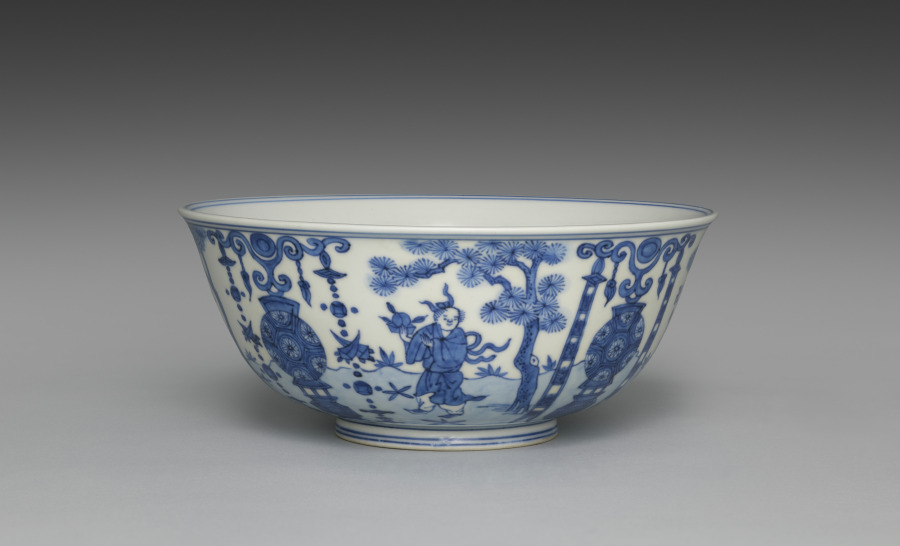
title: Bowl from Nesting Bowls with Daoist Immortals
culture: Japan, Meiji period (1868–1912)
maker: Seifū Yohei III (Japanese, 1851–1914)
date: 1893–1914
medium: Inner bowl from a set of three bowls; porcelain with underglaze blue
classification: Ceramic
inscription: 大日本清風造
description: Yohei III was capable of ink painting–like compositions in underglaze blue, as well as more decorative ones like that on this set of three nesting bowls. Bowls with very similar designs in five colors were produced in the reign of the Wanli emperor (reigned 1572–1620) during the Ming dynasty, and Yohei must have had direct access to one of these or to a close copy. A scene of Daoist immortals is presented on the bowls. On each one, the ground plane is defined with a blue wash. Four lanterns are evenly spaced around the bowl. Two are flanked with linked-piece metalwork banners of the seven treasures. The alternate altars are adorned with textile banners. In between them are four immortals, each standing beneath a tree with small plants surrounding his feet. Two of the immortals hold fruit on a tray. Another carries an elixir-filled ewer and a willow branch. The fourth holds a swastika (manji), here an auspicious symbol, and a flower. Curiously, the inscription inside each footring reads “Made by Seifu of Great Japan,” in emulation of the dynasty and reign inscriptions that appear on Chinese ceramics; however, one can also see through the translucent glaze another inscription, “Seifu Yohei,” written in large characters within a double band of blue on the largest bowl.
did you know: In the bottom of each bowl is a scene of two robed immortals who appear to stand on a precipice in a mountainous landscape high in the clouds, with celestial orbs over their heads.